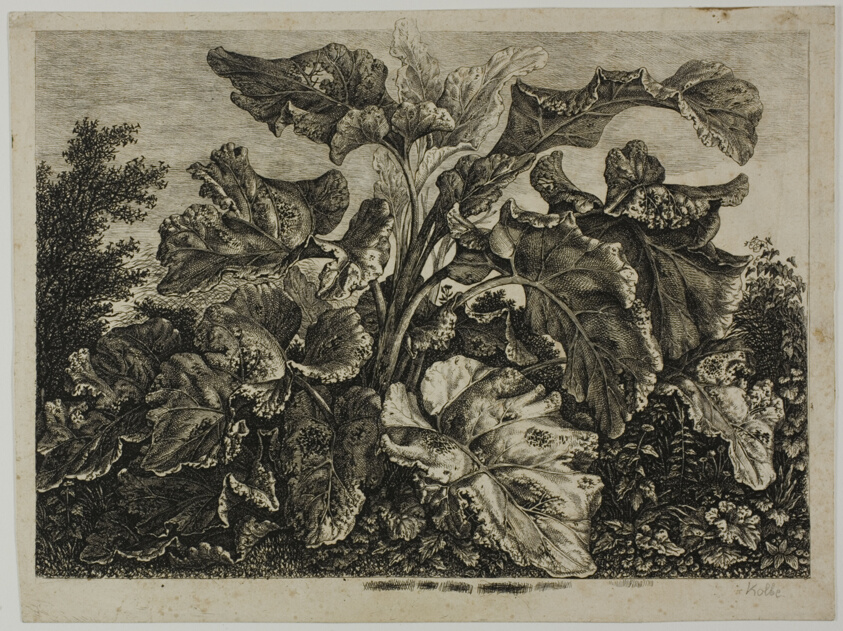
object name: Print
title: Vegetable Sheet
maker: Carl Wilhelm Kolbe, the elder (German, 1759-1835)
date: 1800/28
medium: Etching on cream wove paper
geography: Germany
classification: etching; print; prints and drawing